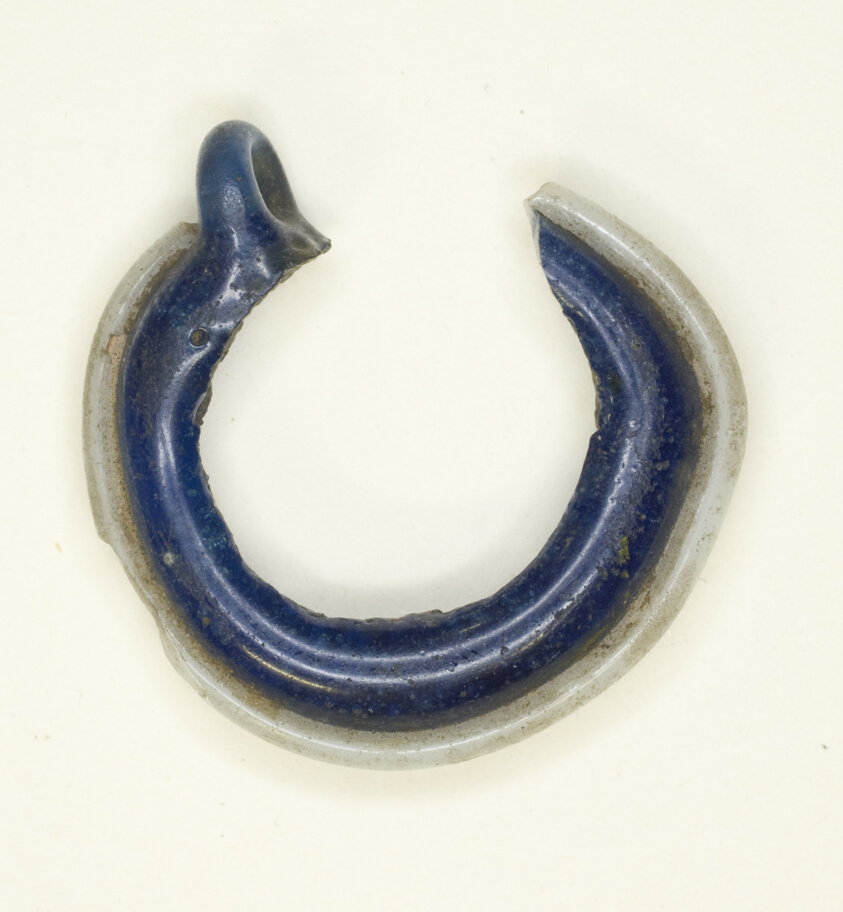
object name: Costume and Accessories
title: Earring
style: new kingdom, egyptian, ancient, eighteenth dynasty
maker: Egyptian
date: New Kingdom, mid- to late Dynasty 18, about 1400–1295 BCE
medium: Glass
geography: Egypt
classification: jewelry; glass; ancient art; costume; ear ornament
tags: jewelry, beauty